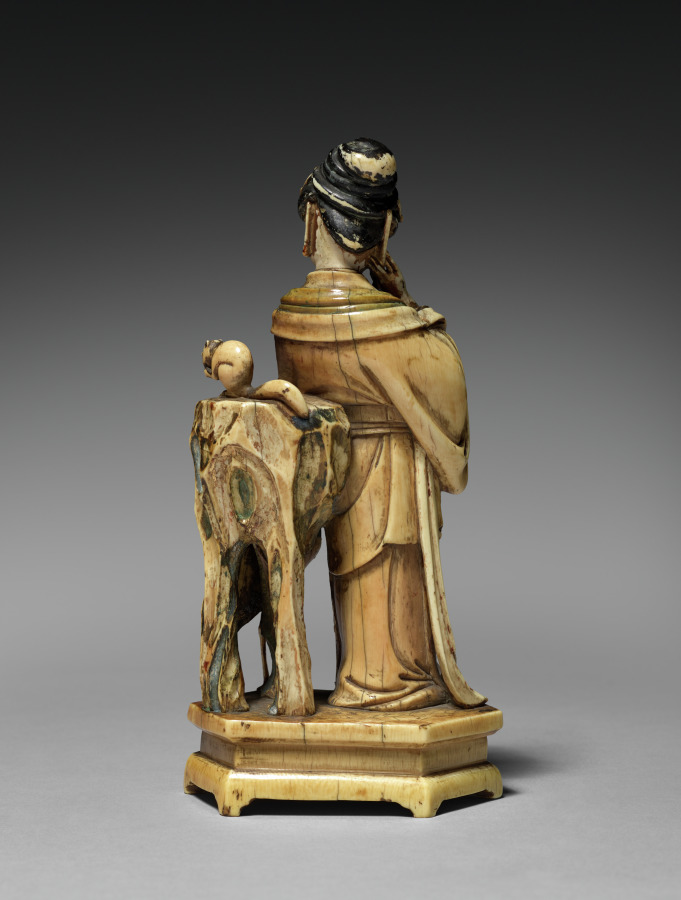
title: Female Figure with Crane and Squirrel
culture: China, Qing dynasty (1644-1911), Kangxi reign (1662-1722)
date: 1662–1722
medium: ivory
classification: Ivory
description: In the Qing dynasty (1644–1911), luxury items became more affordable to larger parts of the society, including women, merchants, and literati in non-official positions. Imperial patronage and a growing urban population encouraged consumption of luxury goods and local craftmanship. This ivory form of a woman with a crane illustrates the superb skills and the creative mind of the talented artisan who sought clients on a competitive market.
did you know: The ivory has aged to a rich amber, while traces of its original red and green paint remain on the woman’s cuffs and collar.